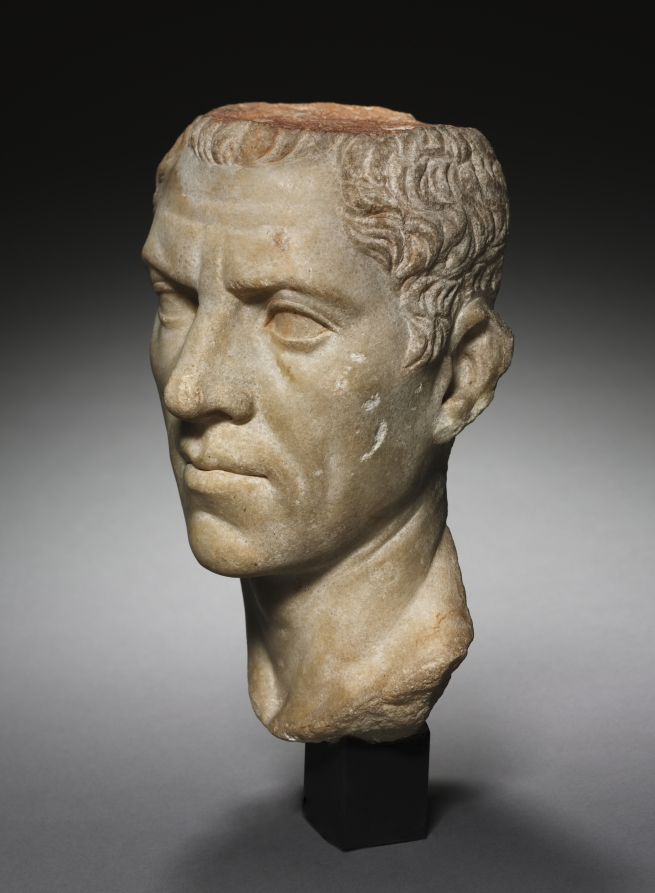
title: Portrait Head of C. Cornelius Gallus (?)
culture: Egypt, Greco-Roman period (332 BCE–395 CE), Roman empire (30 BCE–395 CE)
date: c. 30 BCE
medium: marble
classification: Sculpture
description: This highly individual portrait must have been made for a man of considerable importance. It may represent Gaius Cornelius Gallus, who lived c. 69-26 BC. After aiding Octavian in the war against Antony and Cleopatra, Gallus served as the first governor of Egypt. There he put down two rebellions, but soon fell into disgrace and exile, eventually committing suicide. The head was made to be inserted into a body, and has a flat back and top, suggesting it once wore a separately made fold of toga draped over it (in the fashion known as togatus capite velato, associated with high priests). Some scholars have suggested a later date for this portrait, perhaps in the reign of Nero or Claudius.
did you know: Traces of red paint remain, especially in the hair.